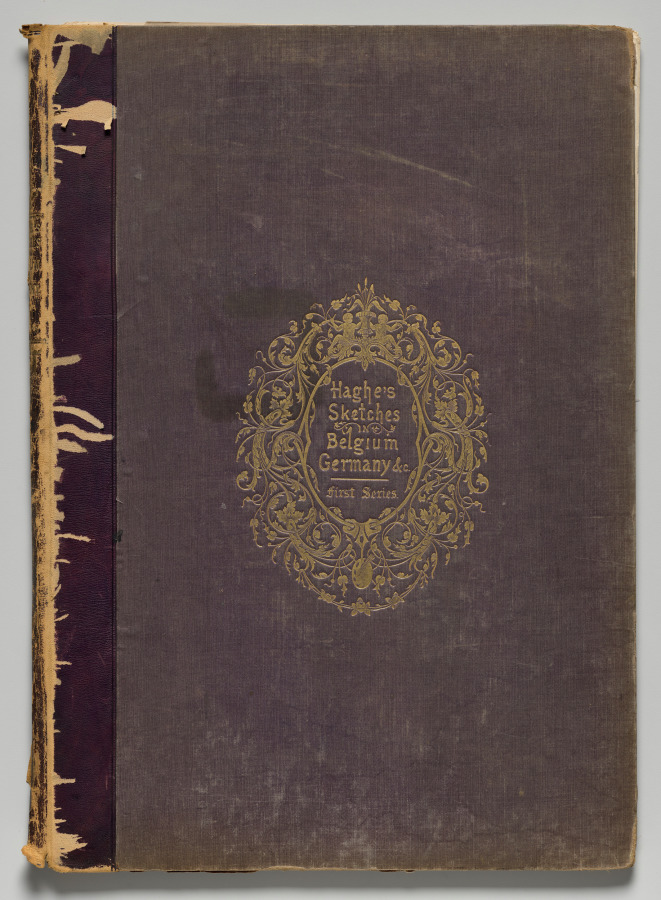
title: Sketches in Belgium and Germany, Second Series: No. 1 - Title Page - St. Jacques, Liege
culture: England, 19th century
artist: Louis Haghe (British, 1806–1885)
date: 1845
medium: lithograph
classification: Print